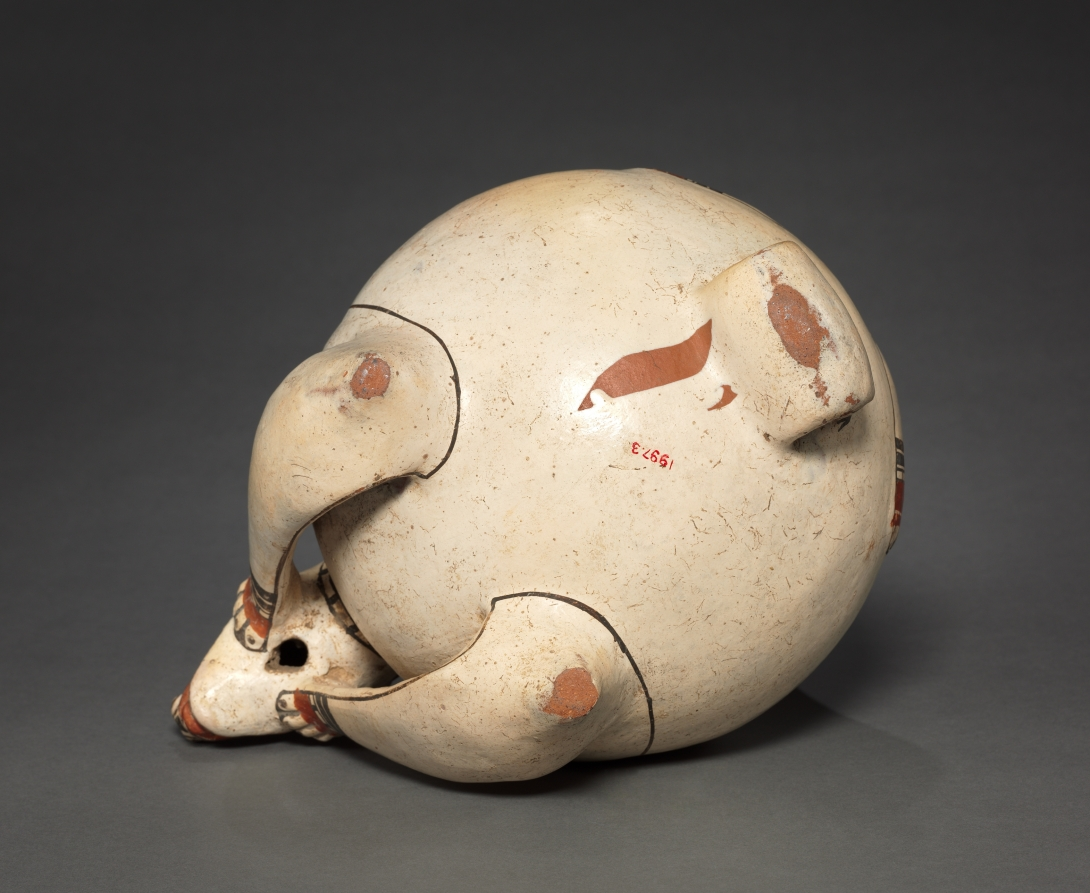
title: Animal Effigy Vessel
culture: Costa Rica, Southern Nicoya region, Pataky Polychrome style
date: 1000–1550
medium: earthenware with colored slips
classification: Ceramic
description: The Pataky style excells in animal portrayals that combine a modeled head with a flat vessel chamber that doubles as the animal’s body. It may be important that many of these animals strike human poses; creatures that combine the human and animal often have mythic import.